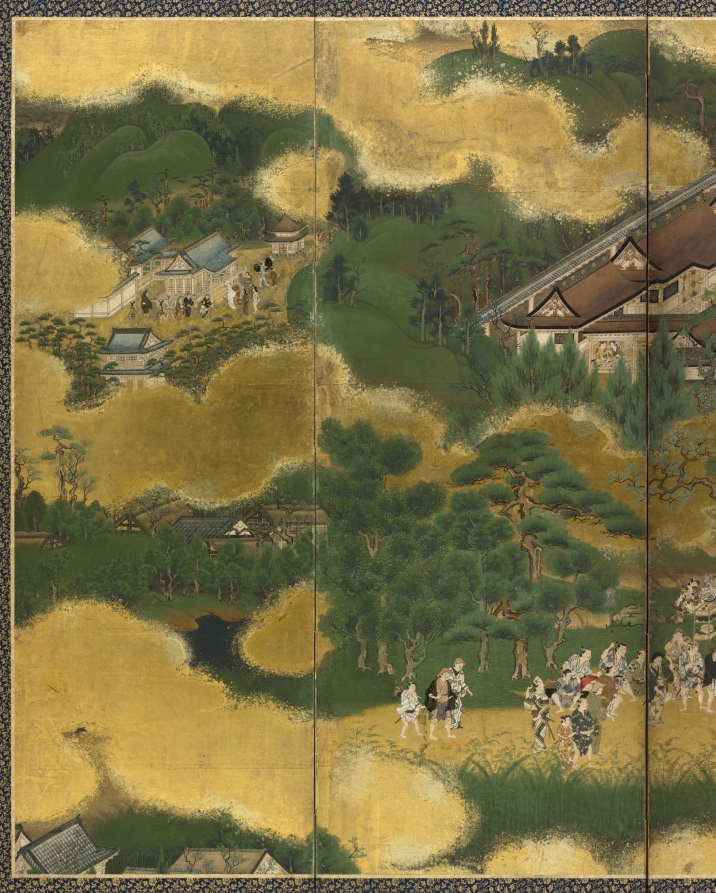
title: Horse Race at the Kamo Shrine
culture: Japan, Edo period (1615–1868)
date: early to mid-1600s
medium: One of a pair of six-panel folding screens; ink and color on gilded paper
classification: Painting